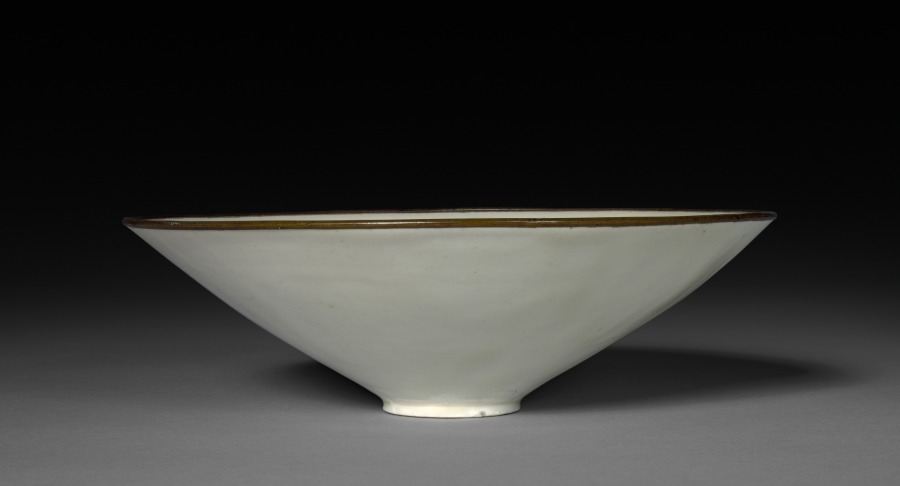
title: Bowl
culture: China, Hebei province, Chuyang District, Jin dynasty (1115-1234)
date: 12th Century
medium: White porcelain, Ding ware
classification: Ceramic